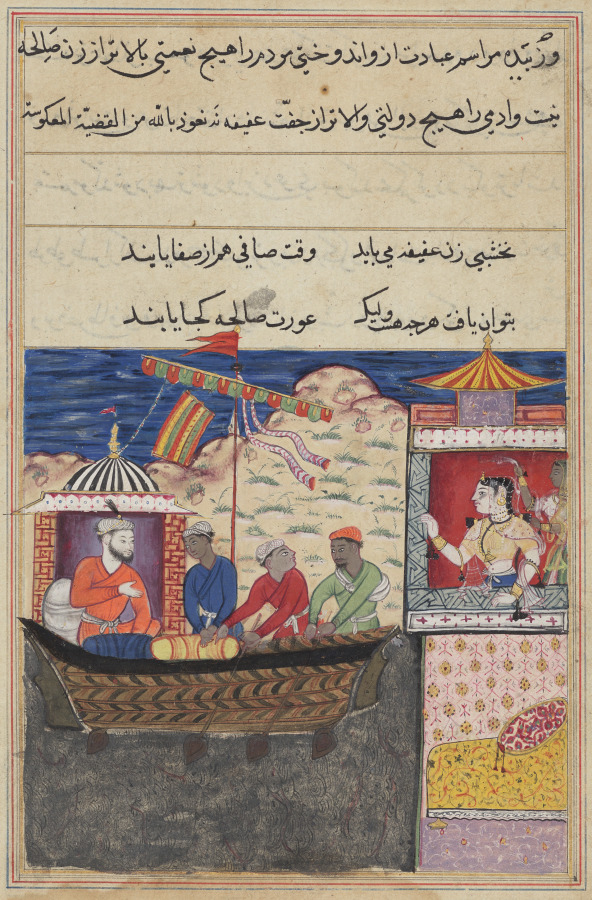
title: The merchant Mansur departs on a sea voyage, leaving his wife behind, from a Tuti-nama (Tales of a Parrot): Seventeenth Night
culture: Mughal India, court of Akbar (reigned 1556–1605)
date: c. 1560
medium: gum tempera, ink, and gold on paper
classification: Painting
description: Mansur, a wealthy and successful merchant, prepares to leave home on a long and dangerous journey. He sits dressed in orange at the head of his ship alongside a group of assistants. His wife, renowned for her virtue and beauty, sees him off from her second-story chamber.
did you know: Thirteen fish are hidden in the dark waters beneath Mansur’s ship.